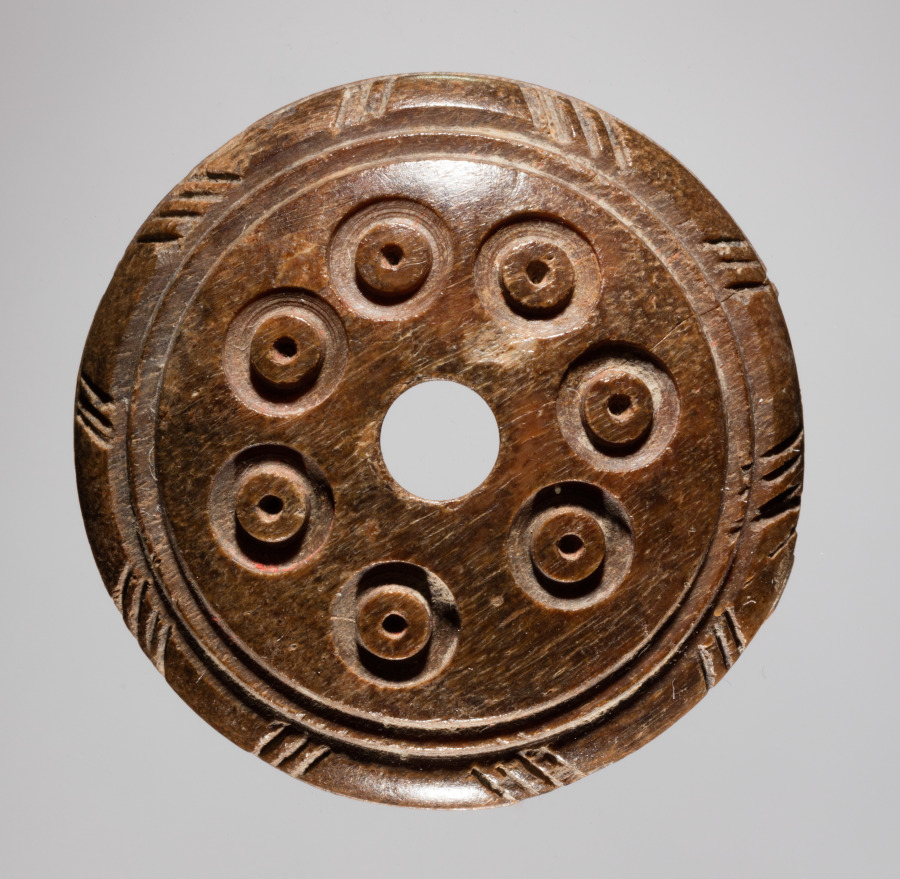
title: Spindle Whorl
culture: Iran, early Islamic period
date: 700s - 900s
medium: bone, incised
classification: Spindle Whorl